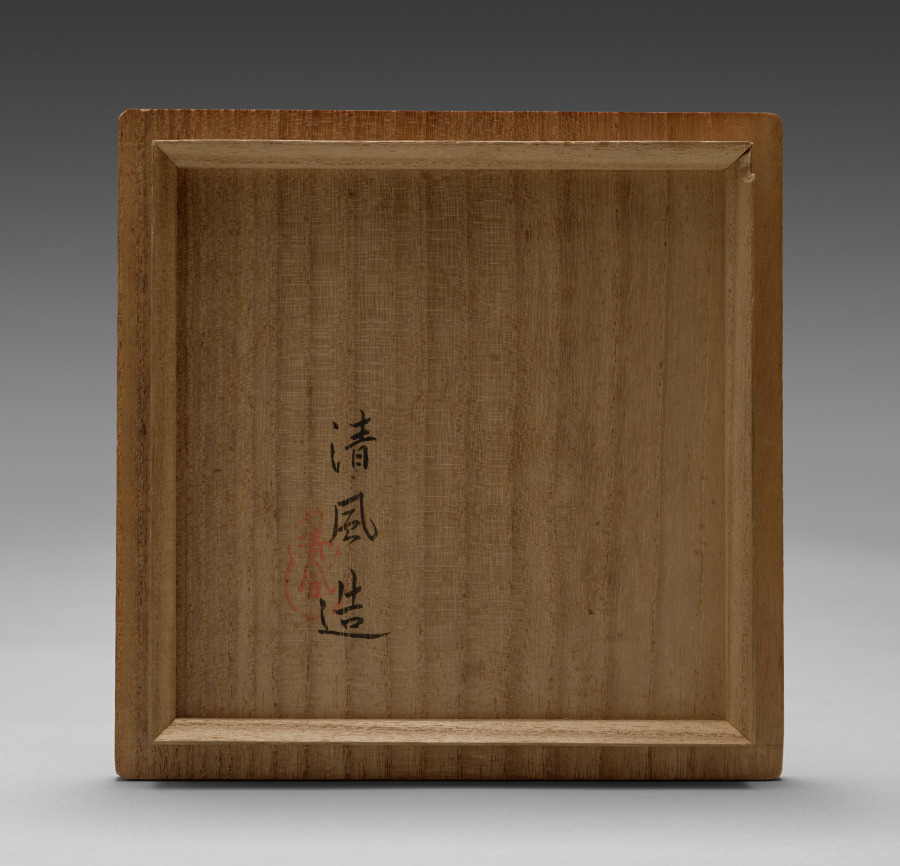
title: Gu-Shaped Vase with Patina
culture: Japan, Taishō period (1912–26) or Shōwa period (1926–89)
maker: Seifū Yohei IV (Japanese, 1872–1951)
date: 1914–46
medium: Porcelain with overglaze color enamel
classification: Ceramic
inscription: 清風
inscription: 成山清風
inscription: 清風造 【印】 清風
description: Yohei IV’s interest in bold, colorful designs is on full display in this purple gu-shaped vase. He not only exhibits his penchant for bold colors but also shows off a complex surface that suggests the patina on an ancient bronze. The body of the vase is a dark, greenish blue over which there is a thick application of color. While the predominant overlaid color is lavender purple, salmon pink and cornflower blue appear in places along with myriad nearly black forms, perhaps floating dandelion seeds or tiny flowers, scattered over the surface.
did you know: The glaze recalls in some respects a Chinese glaze named “snowflake blue,” or xuehualan (Japanese sekka’ai), a low-fired lead-fluxed glaze.